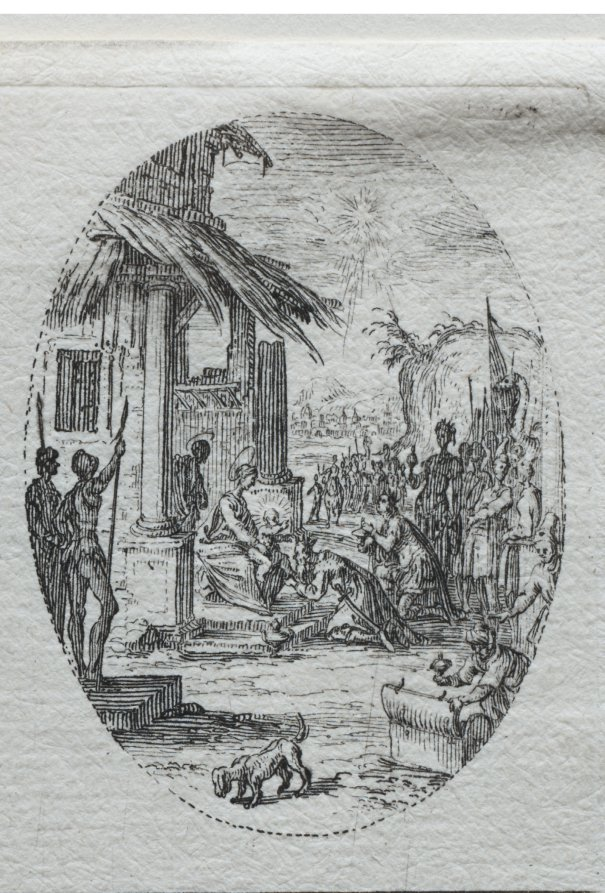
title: The Mysteries of the Passion: The Adoration of the Kings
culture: France, 17th century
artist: Jacques Callot (French, 1592–1635)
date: 1631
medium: etching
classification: Print